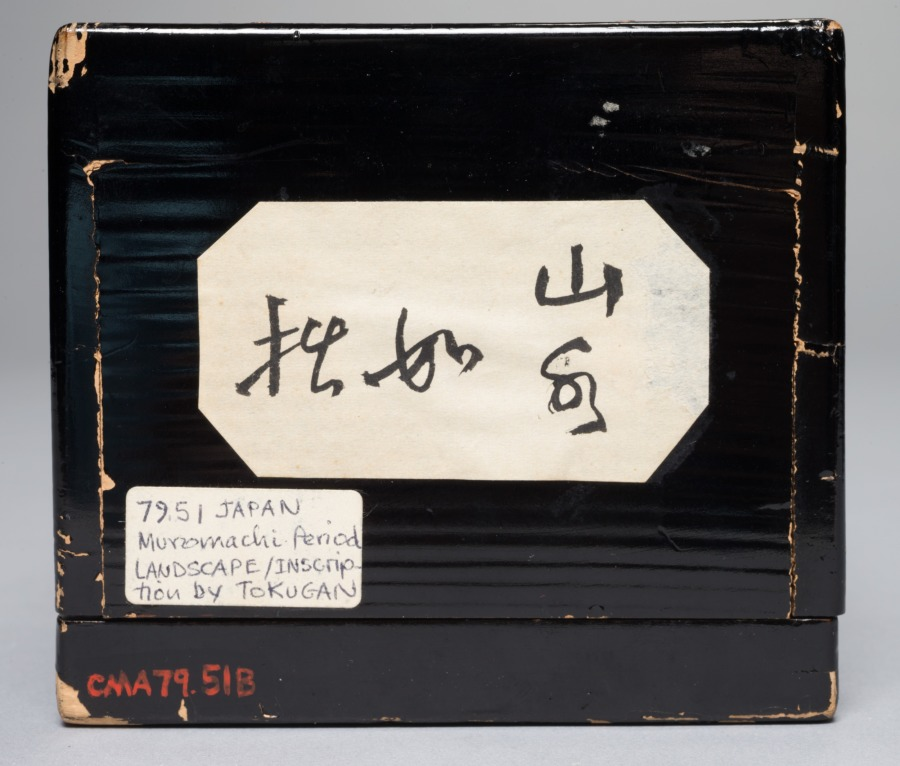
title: Landscape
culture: Japan, possibly Edo period (1615-1868)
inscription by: copy after Ishō Tokugan (Japanese, c. 1359–1437)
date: early 1600s to mid-1800s?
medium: hanging scroll; ink and slight color on paper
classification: Painting